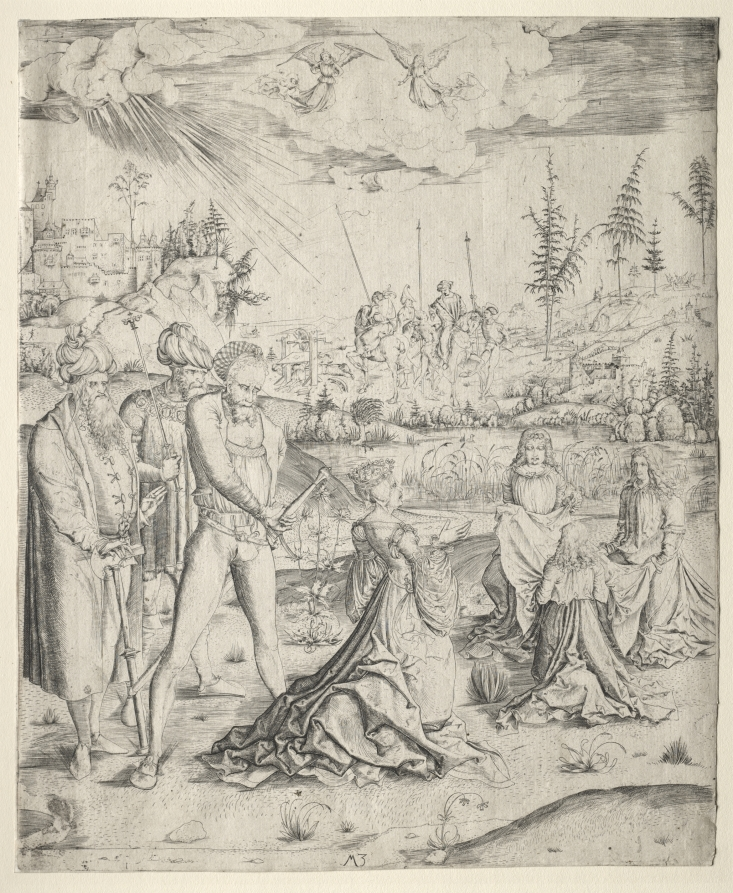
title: The Martyrdom of St. Catherine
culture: Germany, early 16th Century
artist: Master MZ (German)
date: 1500–03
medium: engraving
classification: Print